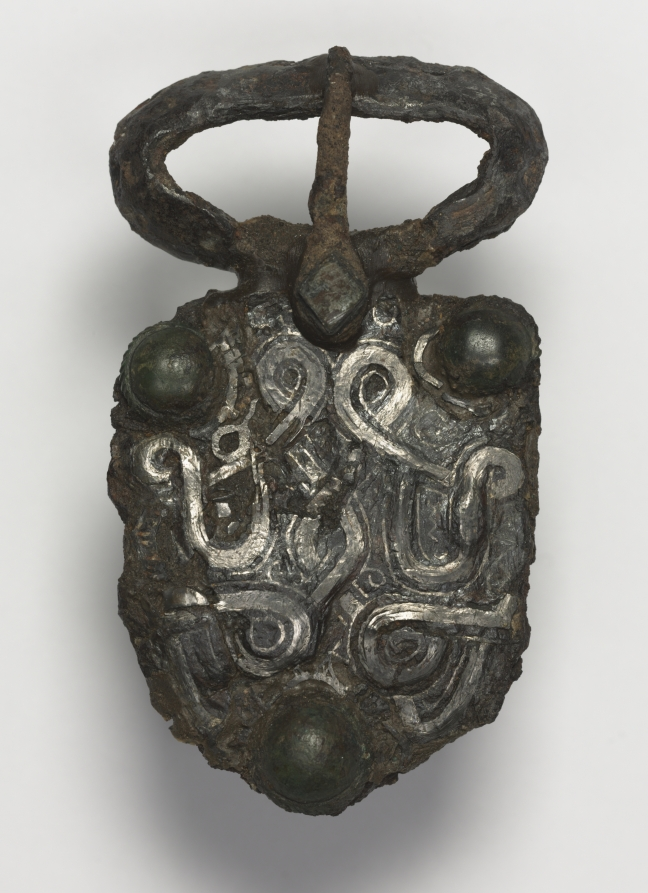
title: Belt Buckle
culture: Frankish, Migration period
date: 600s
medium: iron with silver overlay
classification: Jewelry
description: This buckle would have been attached to a strip of leather worn around the waist. It was likely both an ornamental statement indicating social rank and a practical accessory. The decorative inlay was applied by forcing silver wire into a pattern engraved into the iron. The condition of the buckle indicates that it was likely excavated, perhaps from a grave.